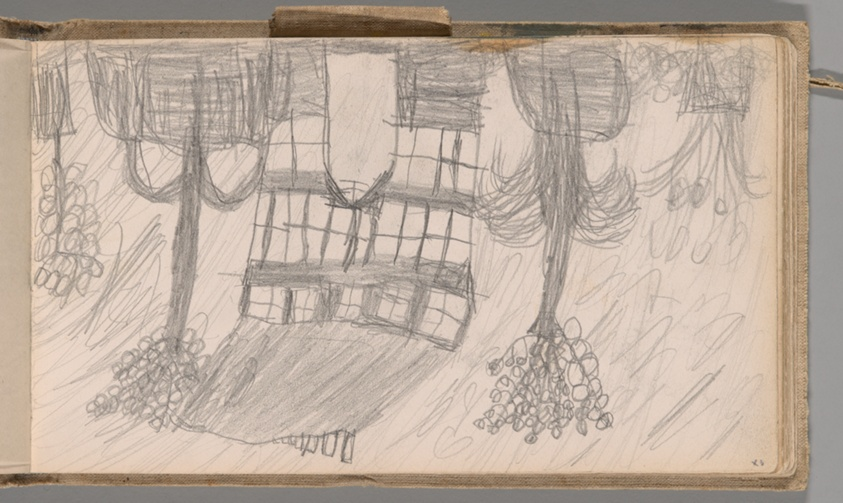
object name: Drawing and Watercolor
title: Sketchbook No. 2 (L'Estaque)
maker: Paul Cézanne; French, 1839-1906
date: 1875–86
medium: Graphite and pen and ink drawings on paper, bound into a book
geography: France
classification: sketchbook; graphite; prints and drawing; paper